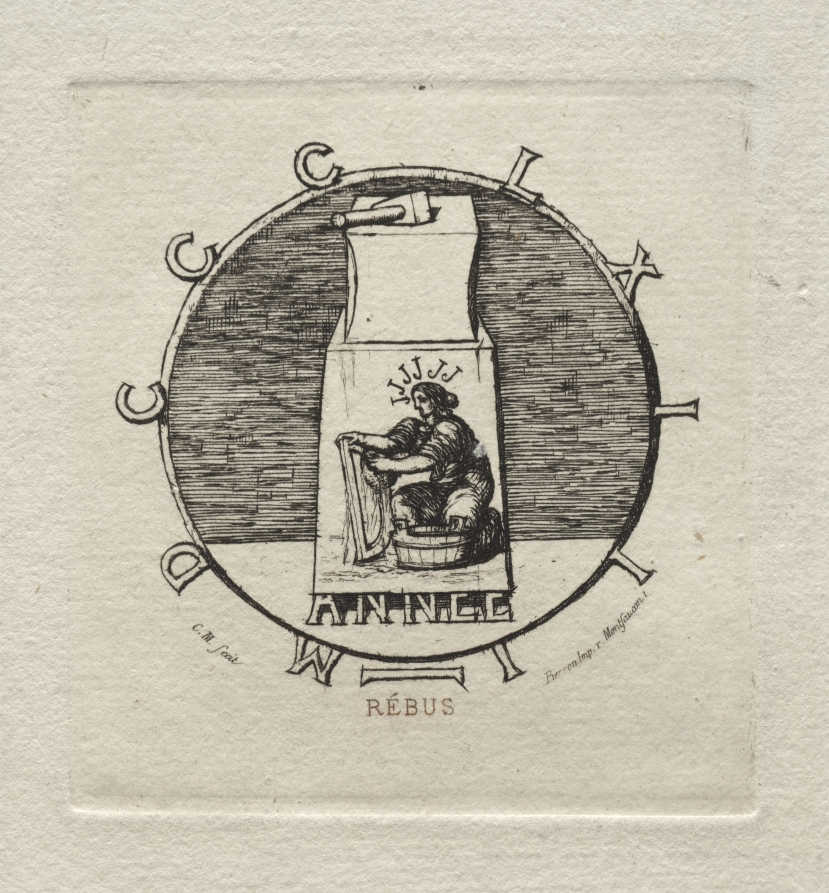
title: Rebus: "Here lies the ancient vendetta"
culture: France, 19th century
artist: Charles Meryon (French, 1821–1868)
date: 1863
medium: etching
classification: Print